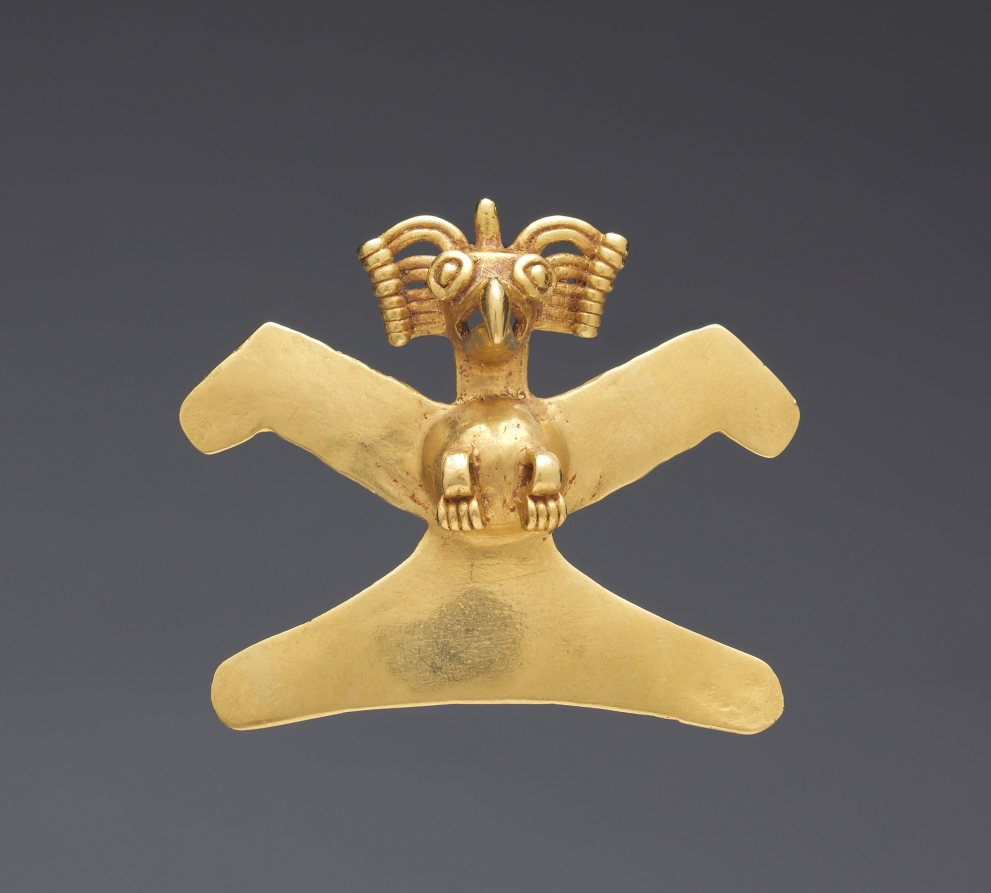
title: Bird Pendant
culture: Panama, Veraguas-Chiriquí style, 10th-16th century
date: c. 1000–1550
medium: cast gold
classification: Metalwork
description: The kinds of birds represented in pendants of the isthmus are not clear, though the emphasis on spread wings and flight suggests birds that soar, such as eagles or hawks. In addition to their aerial agility, they are powerful birds of prey and, therefore, may have symbolized a warrior's or hunter's ferocity and skill. They were also often linked to the sun. Better understanding is difficult because the makers created no written records.